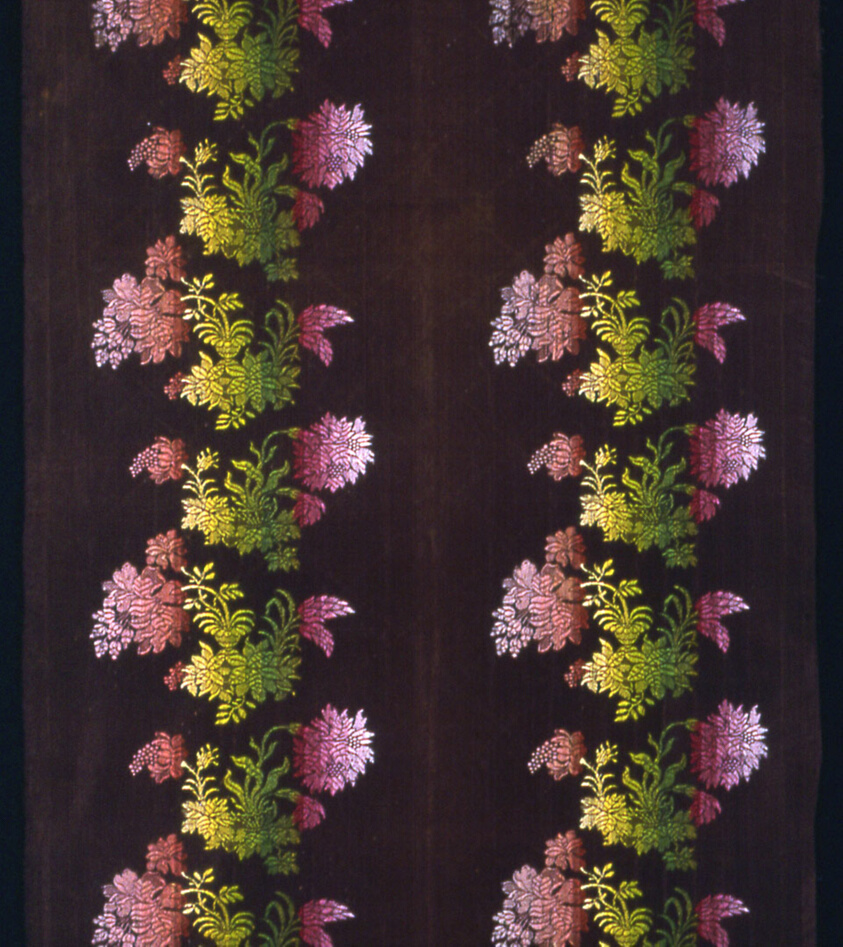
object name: Textile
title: Panel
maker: England, probably Spitalfields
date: 1725/75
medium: Silk, plain weave with supplementary patterning warps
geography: England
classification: textile; weaving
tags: flowers